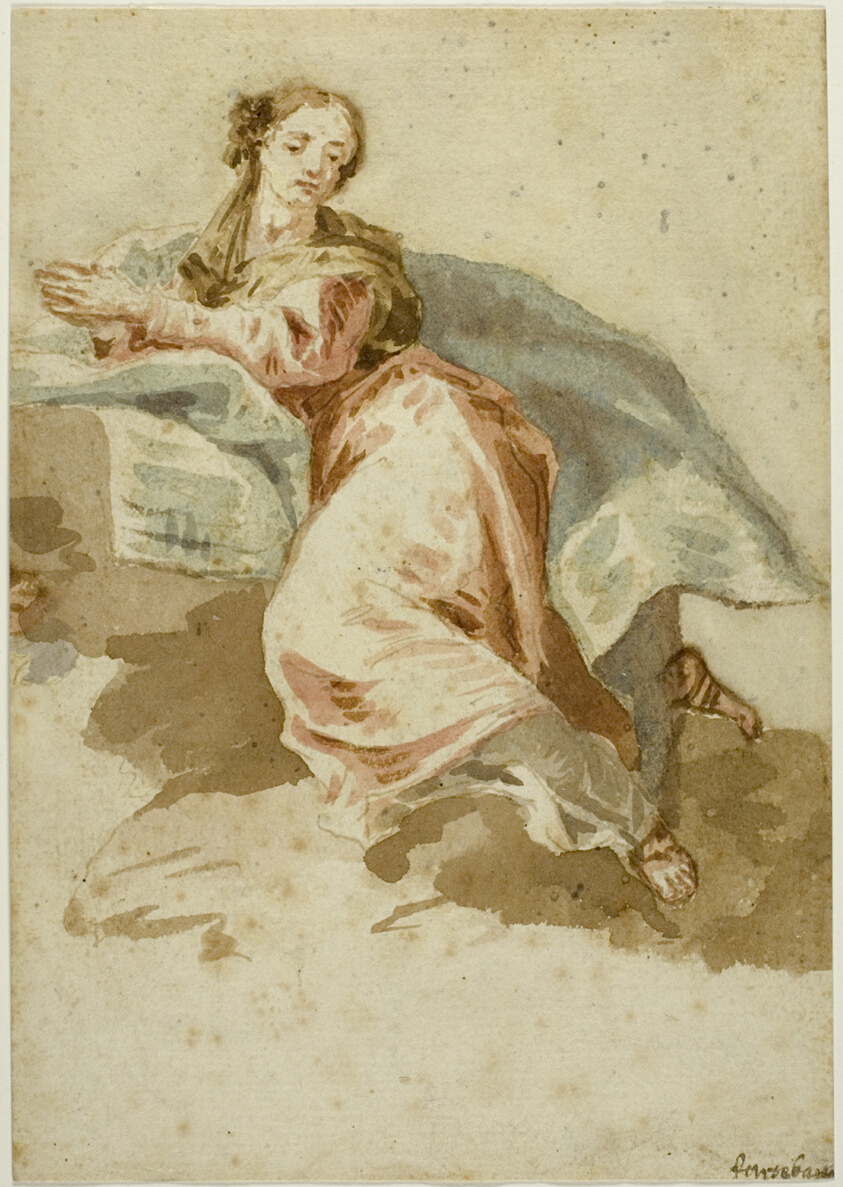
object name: Drawing and Watercolor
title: Draped Female Figure at Prayer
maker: Francesco Fontebasso (Italian, 1707-1769)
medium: Brush and brown ink and watercolor on cream laid paper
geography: Italy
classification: watercolor; drawings (visual works); prints and drawing